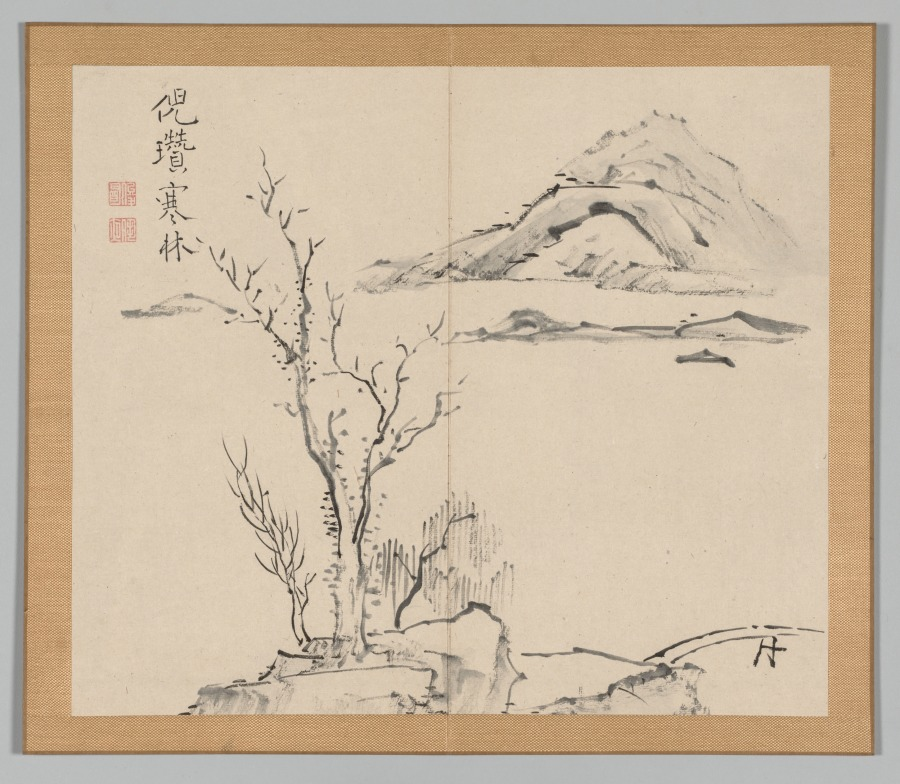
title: Reverberations of Taiga, Volume 2 (leaf 11)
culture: Japan, Edo period (1615–1868)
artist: Aoki Shukuya (Japanese, d. 1802)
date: mid- to late 1700s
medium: double-leaf from a pair of albums; ink and light color on paper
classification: Portfolio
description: Traditionally, young painters in Japan began their studies with an established master-painter. The master's compositions invariably became models that the apprentice copied to learn various ink and brush techniques. Shukuya was a pupil of the famous Kyoto artist Ikeno Taiga, whose style is reflected in these sketches of rocks, trees, and mountains.